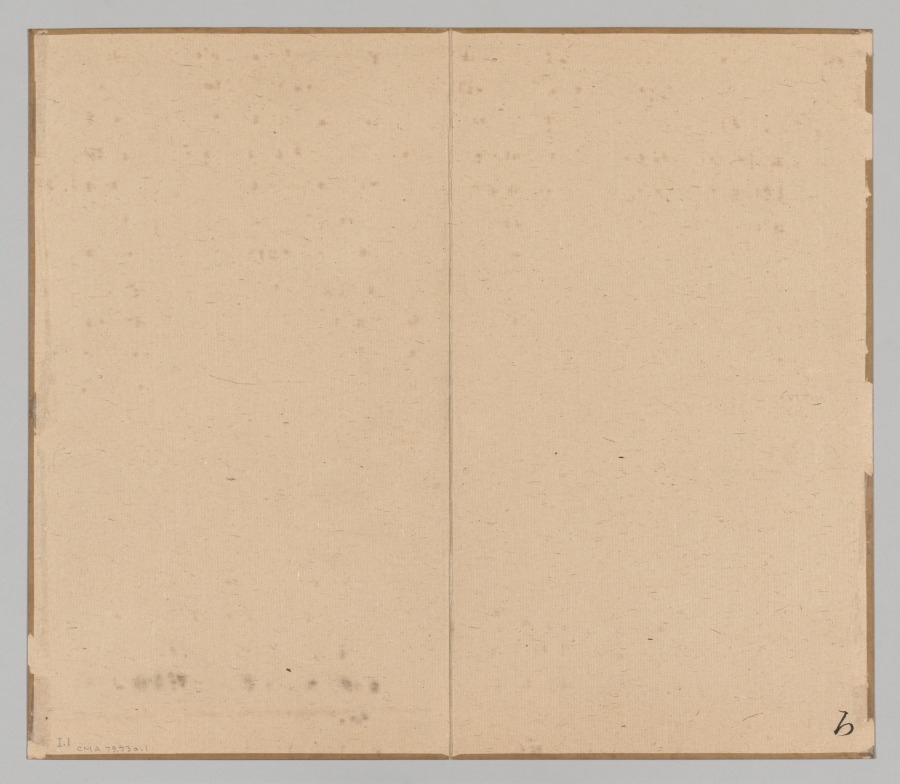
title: Title from "Reverberations of Taiga"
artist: Aoki Shukuya (Japanese, d. 1802)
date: 1912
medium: double-leaf from a pair of albums; ink on silk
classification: Portfolio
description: Kusakabe Meikaku, one of the three most famous Japanese calligraphers of his time, provided a title leaf for a pair of albums of paintings after Ike Taiga (池大雅) (1723–1776) by his student Aoki Shukuya (青木夙夜) (died 1802). Murata Kōkoku, a well-traveled painter with an extensive network of colleagues in China and Japan, wrote a postscript, CMA 1979.73.2.36, for the albums in which he explained that the paintings are faithful copies after Taiga’s images of rocks, mountains, residences, and so forth. These two artists respectfully documented Shukuya’s work more than 100 years after his death.